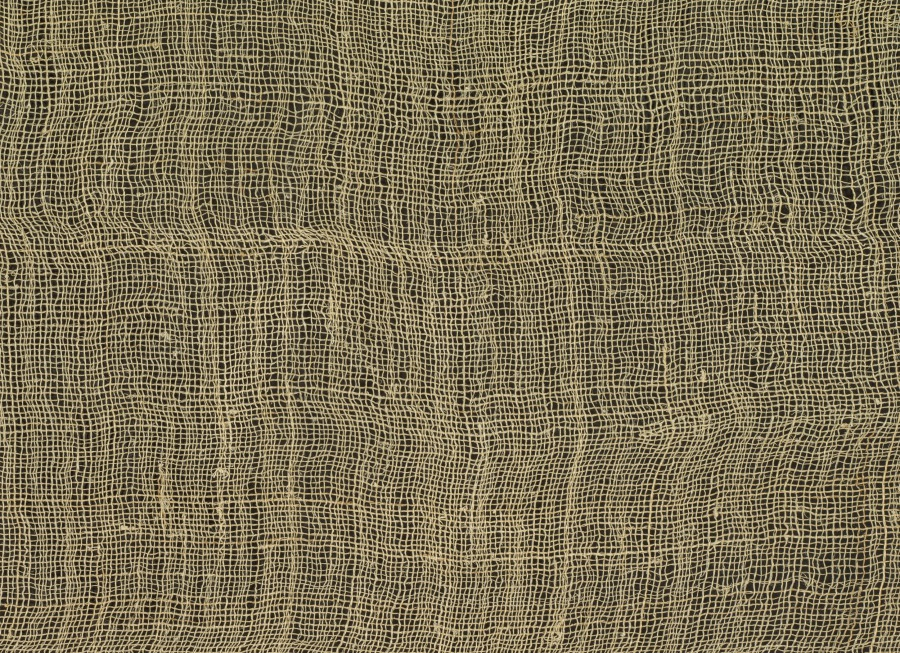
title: Maguey Cloth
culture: Mexico, early 20th century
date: early 1900s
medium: cactus fiber (Maguey plant)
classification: Textile